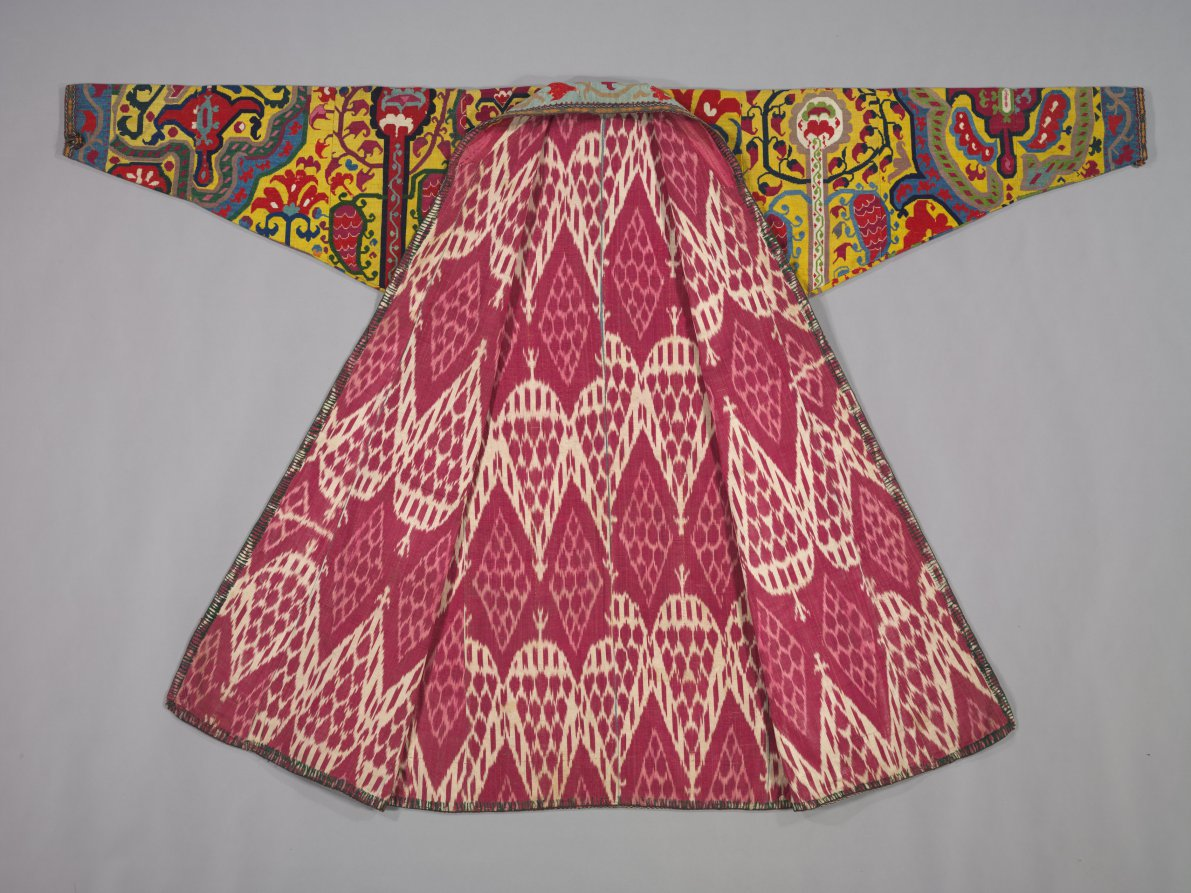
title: Man's surcoat (khalat)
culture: Uzbekistan, Shahr-i Sabz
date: late 1800s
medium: Silk: embroidery, cross-stitch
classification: Garment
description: Prestigious men’s surcoats embellished with designs such as this dramatic decoration in cross-stitch were among the most elaborate silk-thread embroidered garments in Central Asia. In a flamboyant style, large palmettes framed by split palmette leaves dominate with quartered rosettes and smaller flora on a brilliant yellow ground. Foliate vines enhance the edge along the front center opening, hemline, and cuffs. It is lined with an ikat of cypress trees and finger-looped trim. The style and technique represent professional work from Shahr-i Sabz, south of Samarkand. The pattern was drawn on the cotton ground cloth of the surcoat, then disassembled for stitching, and finally reassembled—revealed by severed and misaligned motifs plus mismatched colors.